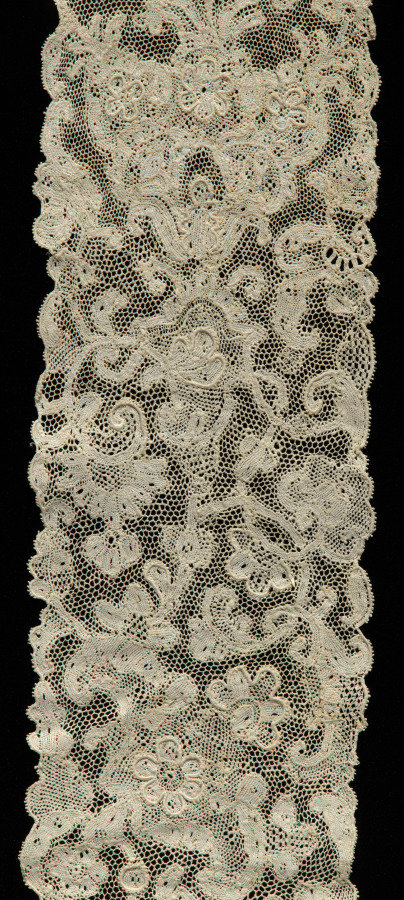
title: Lace Cap with Lappets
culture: France, Sedan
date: 1700s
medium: Needle lace (Point de Sedan)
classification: Lace